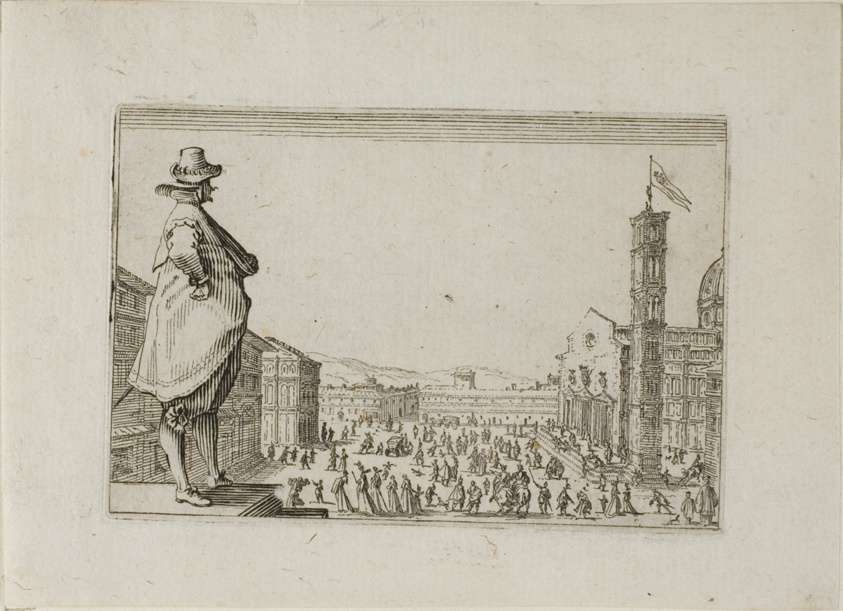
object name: Print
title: The Duomo in Florence, from The Caprices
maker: Jacques Callot (French, 1592-1635)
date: c. 1622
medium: Etching on ivory laid paper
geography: France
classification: etching; print; prints and drawing